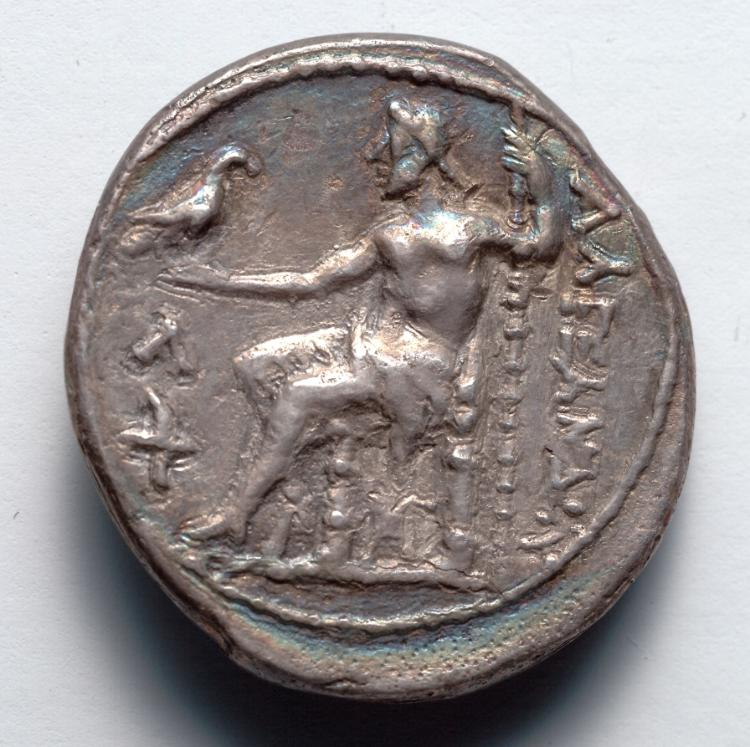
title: Tetradrachm: Zeus, Seated, l., Holding Staff and Eagle, Torch Left (reverse)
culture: Greek, Macedonian, minted at Amphipolis (Macedonia), reign of Alexander III [The Great]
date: 336–323 BCE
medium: silver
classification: Coins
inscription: Λ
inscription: ΑΛΕΞΑΝΔΡΟΥ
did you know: Alexander the Great claimed descent from Herakles and Zeus, picturing them both on his coinage.